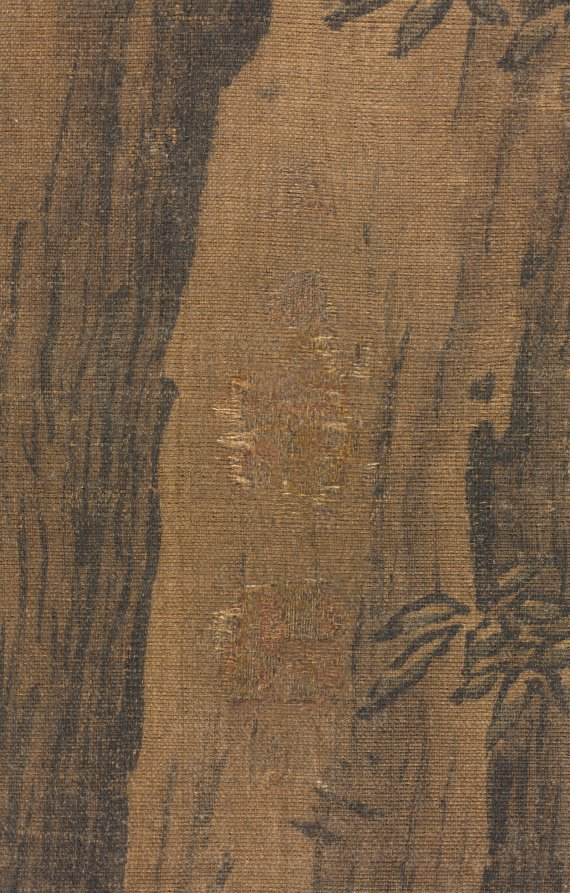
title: Birds in a Grove in a Mountainous Winter Landscape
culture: China, Jin dynasty (1115-1234)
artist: possibly by Gao Tao (Chinese, 1100s)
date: 1100s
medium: hanging scroll; ink and slight color on silk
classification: Painting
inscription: A signature and a seal at lower left edge: Gao Tao 高燾; seal undecipherable. 10 additional seals: 1 of Zhu Gang 朱棡 [1358–1398]; 3 of Suo’etu 索額圖 [1636–1703]; 2 of A’erxipu 阿爾喜普 [1700s]; 1 of Weng Fanggang 翁方綱 [1733–1818]; 3 unidentified.